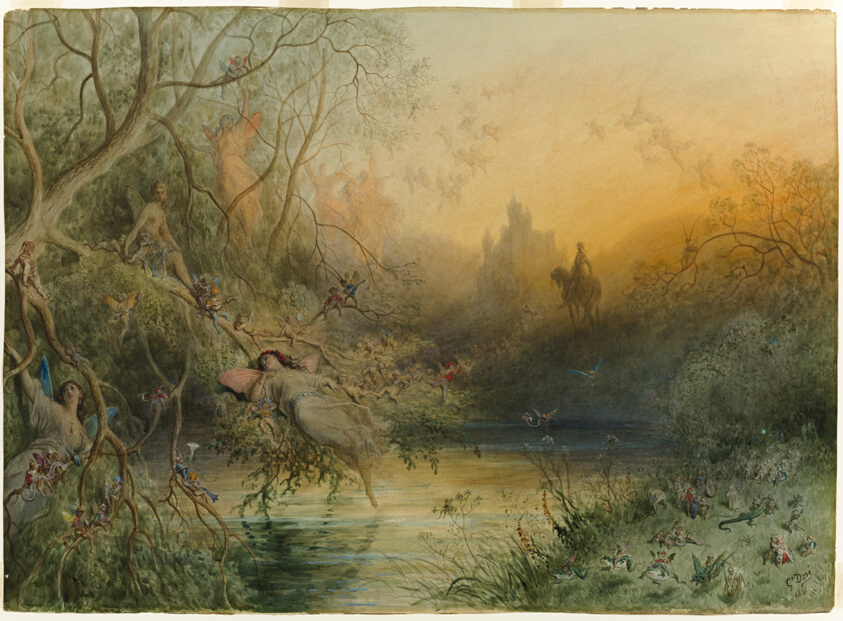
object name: Drawing and Watercolor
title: Fairy Land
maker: Gustave Doré (French, 1832-1883)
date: 1881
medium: Watercolor, with touches of gouache, over graphite, on cream wove paper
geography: France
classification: watercolor; drawings (visual works); prints and drawing